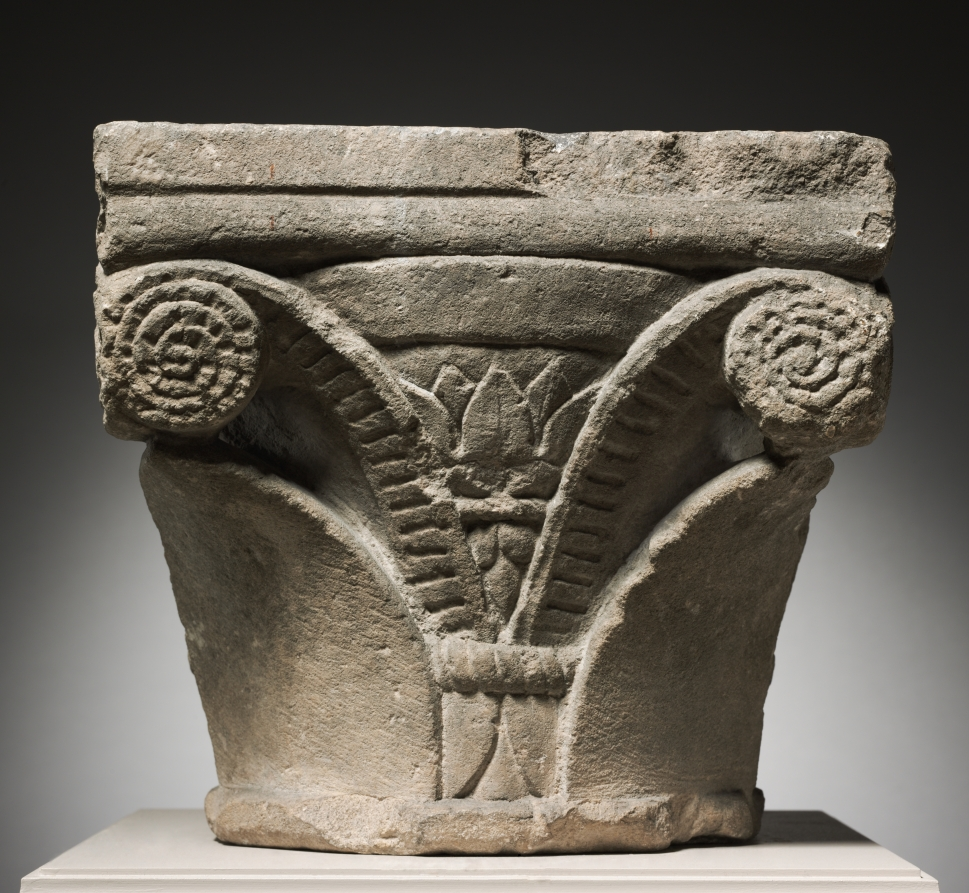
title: Capital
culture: Italy, Migration period, 8th-9th Century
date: 700s-800s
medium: marble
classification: Sculpture